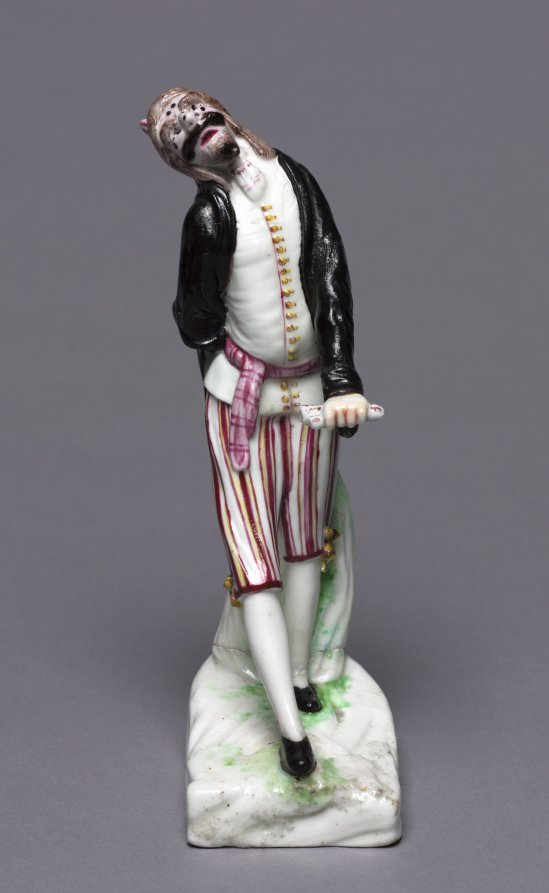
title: Figure of Pantalone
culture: France, Mennecy, 18th century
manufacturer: Mennecy Factory (French)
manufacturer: Mennecy- Villeroy Factory (French)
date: c. 1755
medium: soft-paste porcelain with enamel decoration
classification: Ceramic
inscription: Mennecy-Villeroy factory mark, incised on bottom: "DV"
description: The commedia dell’arte, a form of Italian improvisational theater, became widely popular in 18th-century Europe. This figure, with his prominent beard and distinguishing black robe, represents the character of elderly Venetian merchant Pantalone. Depicted in paintings and porcelain, the popularity of these figures demonstrated the influence of the theater on the tastes of the wealthy.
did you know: In the commedia dell’arte, Pantalone was known for his greed, lust, and buffoonery that made him the target of jokes.